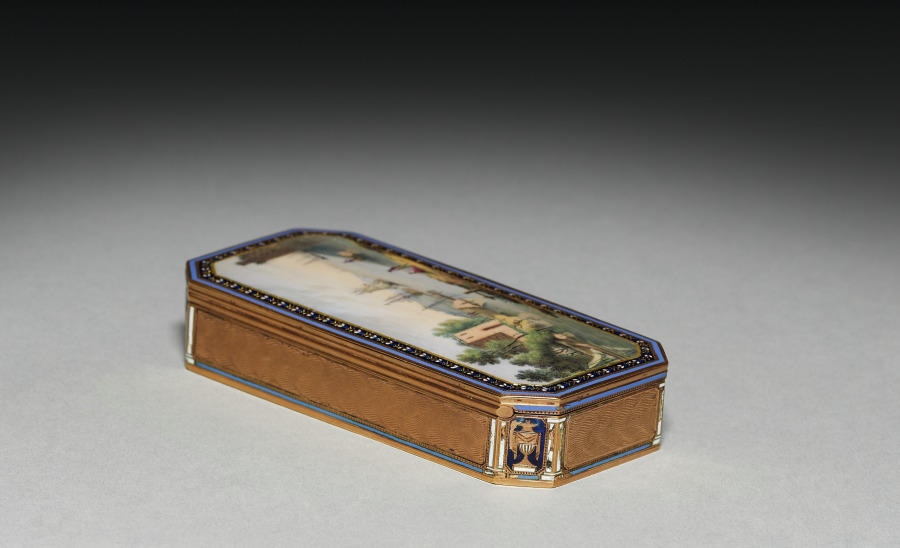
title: Box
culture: Switzerland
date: early 1800s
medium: gold and enamel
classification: Miscellaneous